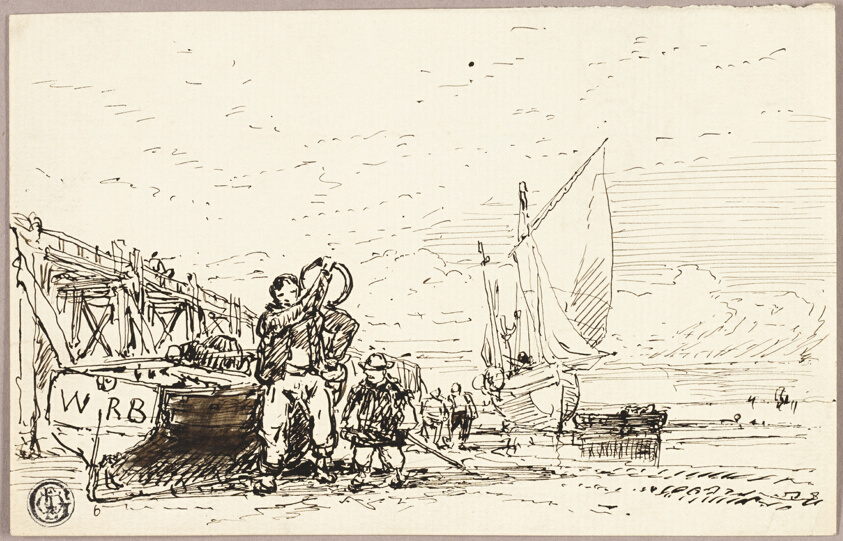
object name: Drawing and Watercolor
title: Harbor Scene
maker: William Roxby Beverley (English, c. 1811-1889)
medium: Pen and black ink, with traces of brush and brown wash, on ivory laid paper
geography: England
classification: pen and ink drawings; paper; drawings (visual works); prints and drawing